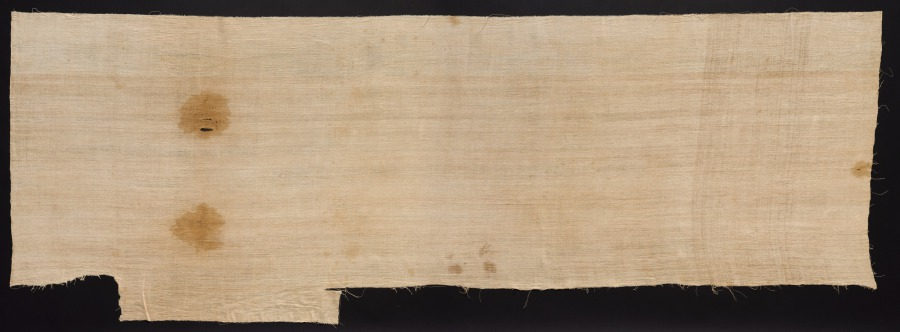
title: Mummy Linen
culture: Egypt, New Kingdom (1540–1069 BCE), Dynasty 18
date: 1540–1296 BCE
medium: plain weave: linen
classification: Textile